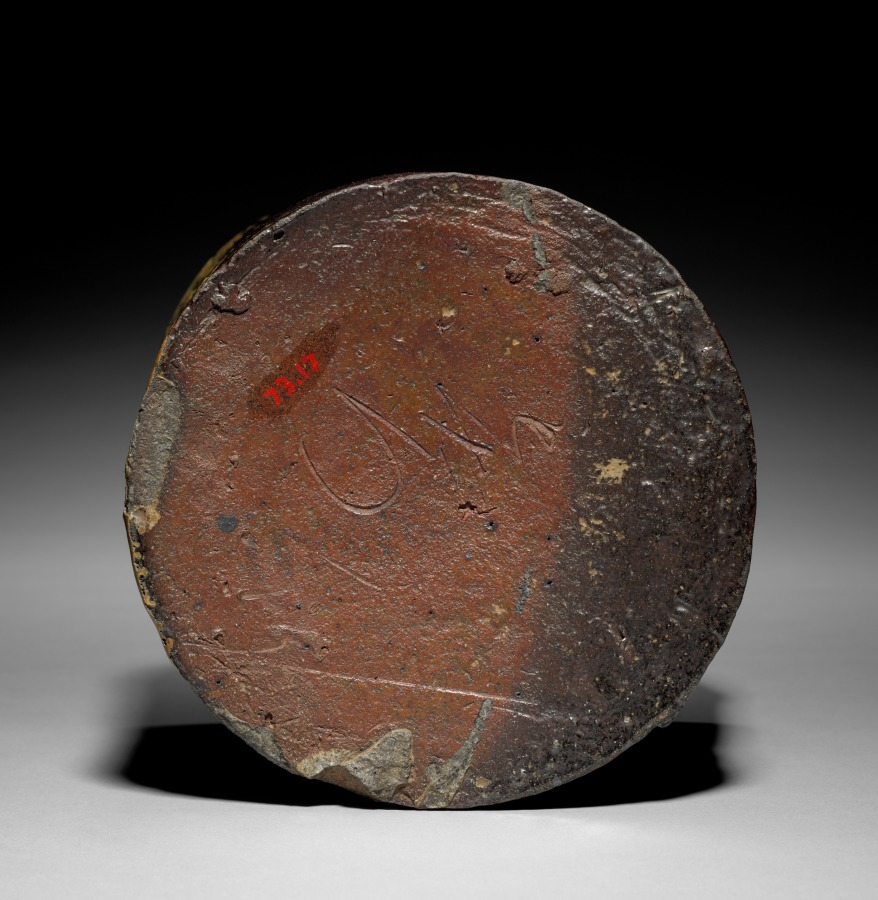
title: Water Container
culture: Japan, Momoyama period (1573–1615)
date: early 1600s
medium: glazed stoneware (Bizen ware, Imbe type)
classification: Ceramic